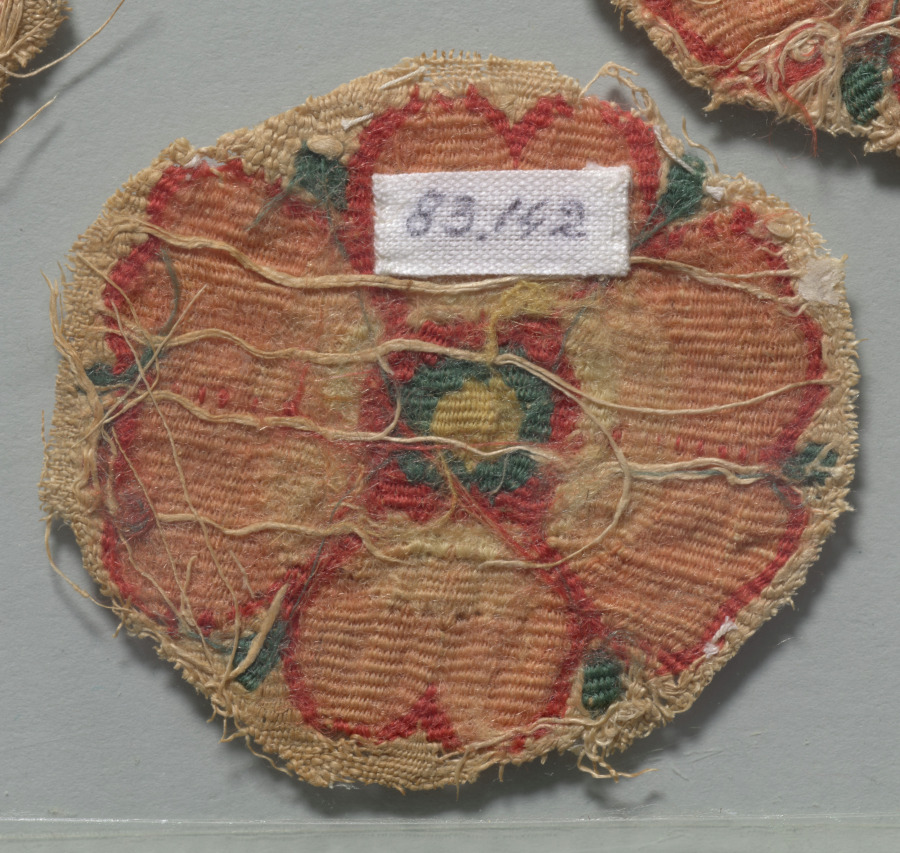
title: Fragments from a Curtain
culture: Egypt, Byzantine period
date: 300s–500s CE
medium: tapestry (originally inwoven in tabby ground, applied to plain tabby linen); linen and wool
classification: Textile